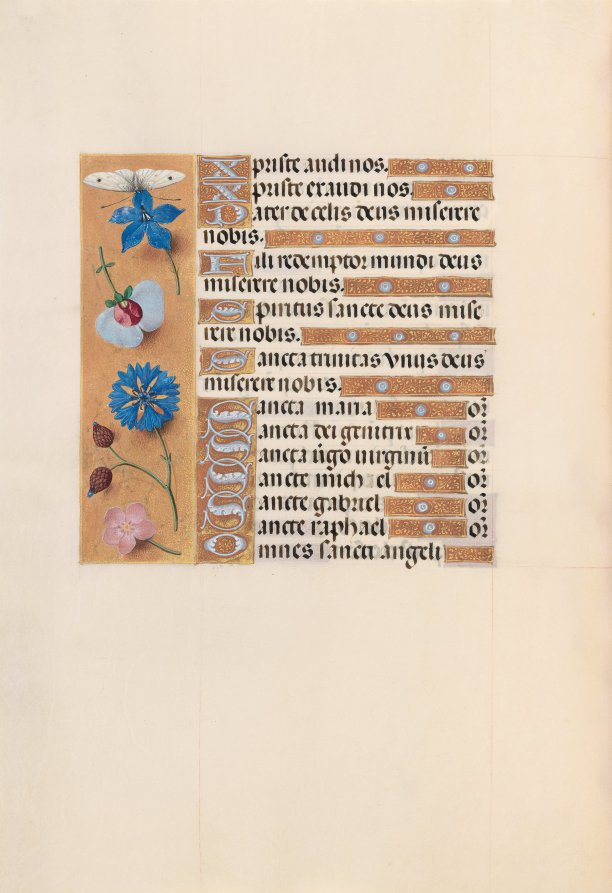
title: Hours of Queen Isabella the Catholic, Queen of Spain: Fol. 210v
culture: Flanders, Ghent and Bruges, late 15th century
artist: Master of the First Prayerbook of Maximillian (Flemish, c. 1444–1519)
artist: and Associates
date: c. 1500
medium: ink, tempera, and gold on vellum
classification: Bound Volume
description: This manuscript was illuminated by a circle of at least five highly organized manuscript painters active in the Flemish cities of Ghent and Bruges. The principal illuminator was Alexander Bening, who painted the majority of the book's miniatures. Manuscripts produced by this circle of artists are renowned for the decoration of their borders, which typically feature a rich variety of realistically-painted flowers, birds, and butterflies. This prayer book, called a book of hours, was intended not for a cleric, but for the private devotions of a lay person-in this case, Isabella the Catholic, Queen of Spain (1451-1504). Isabella's coat of arms embellishes the book's frontispiece. It is unlikely that the book was commissioned by the Queen herself; rather, she probably received it as a diplomatic gift from someone courting her patronage, perhaps Cardinal Francisco Jimenez de Cisneros. A Franciscan friar, Jimenez was dependent upon Isabella for his advancement, first to the post of Queen's confessor in 1492, and then to Archbishop of Toledo in 1495.